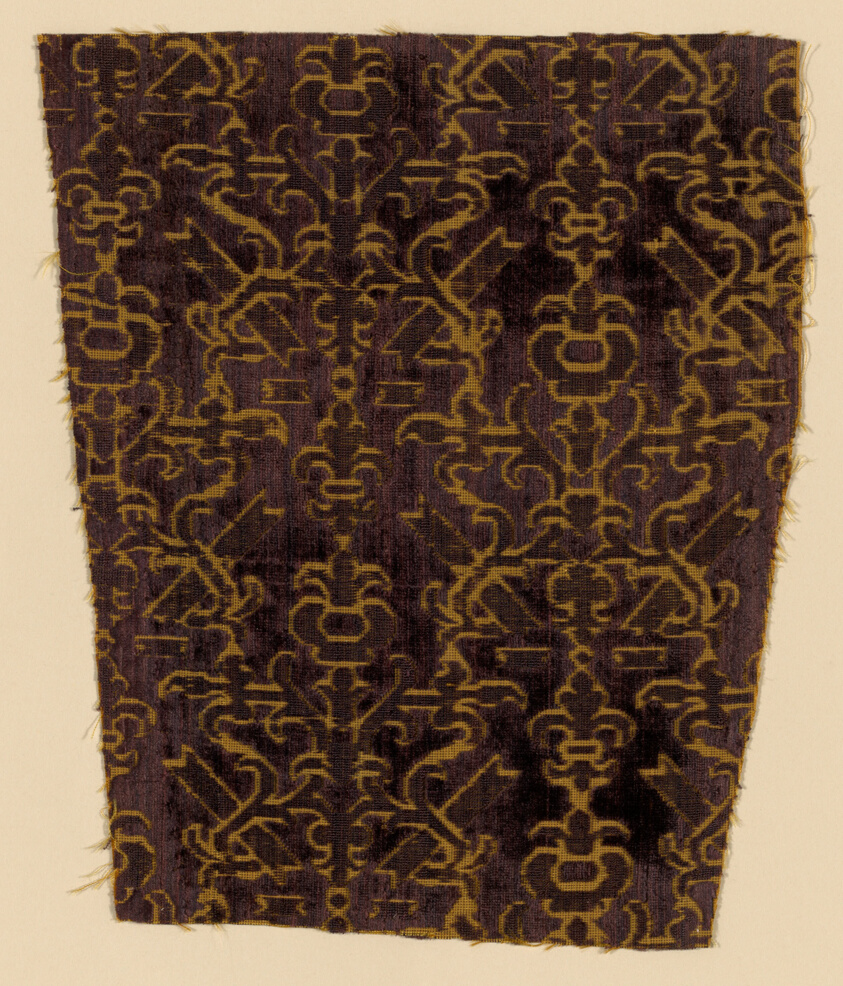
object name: Textile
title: Fragment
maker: Italy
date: Early 17th century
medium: Cisele voided cloth velvet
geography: Italy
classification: textile; weaving - velvet